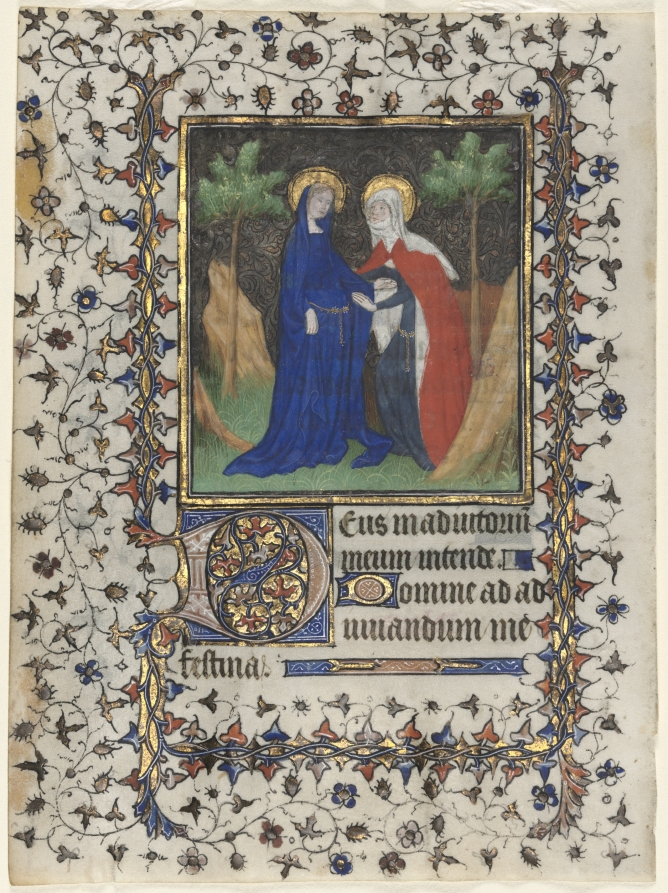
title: Leaf from a Book of Hours: The Visitation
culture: France, Paris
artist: workshop of Boucicaut Master (French, Paris, active about 1410–25)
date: c. 1415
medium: ink, tempera, and gold on vellum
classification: Manuscript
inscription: Deus in adiutorium meum intende. Domine, ad adiuvandum me festina.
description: The heart of every book of hours is the Hours of the Virgin. With this set of prayers, the reader asked the Virgin Mary to intercede on their behalf. The prayers come mostly from the Bible and include psalms, hymns, and readings. The Hours of the Virgin emerged from the eight “hours” of the day in the monastic world’s routine of daily prayers from daybreak to late at night. Originally used solely by the ordained, by the 1000s, these prayers had spread to the general population through their inclusion in books of hours. This section is traditionally illustrated by images from the life of the Virgin Mary, with each hour featuring a different event. The scene of the Visitation opens lauds, the prayers said at night or upon rising.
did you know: Highly customizable, the order of a book of hours shifts, and individual prayers vary, sometimes significantly, from region to region.